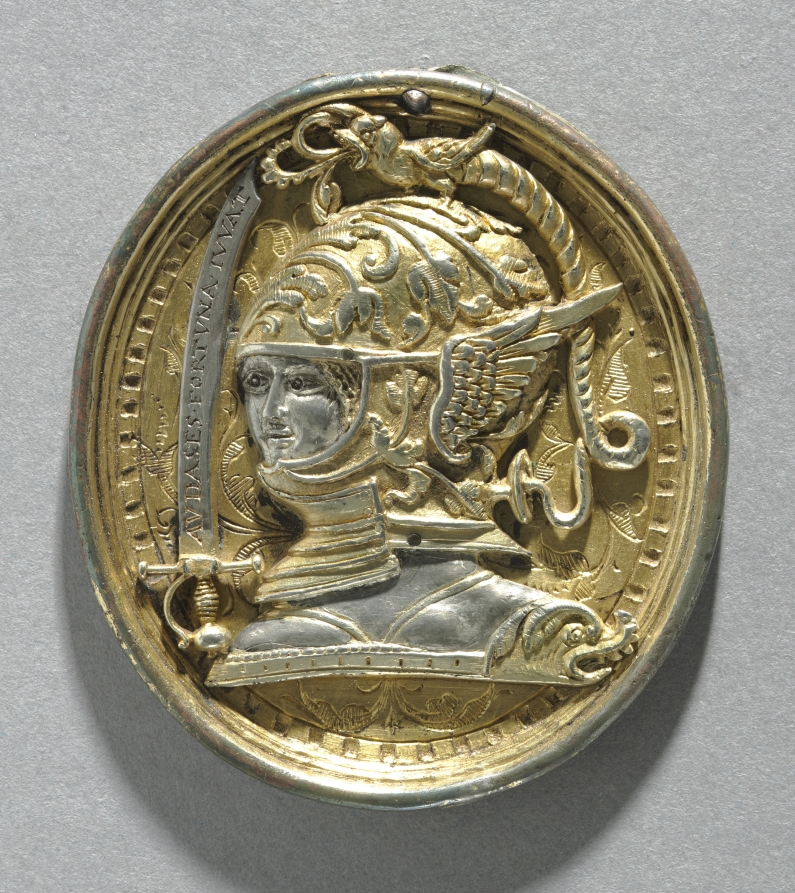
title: Portrait of Archduke Charles of Styria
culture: Austria or South Germany, 16th century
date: c. 1564–70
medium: silver, gilt silver, and gilt copper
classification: Sculpture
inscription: raised sword inscribed with: AVDASES ° FORTVNA ° IVVAT (Fortune assists the brave), the personal motto of Archduke Charles of Syria.